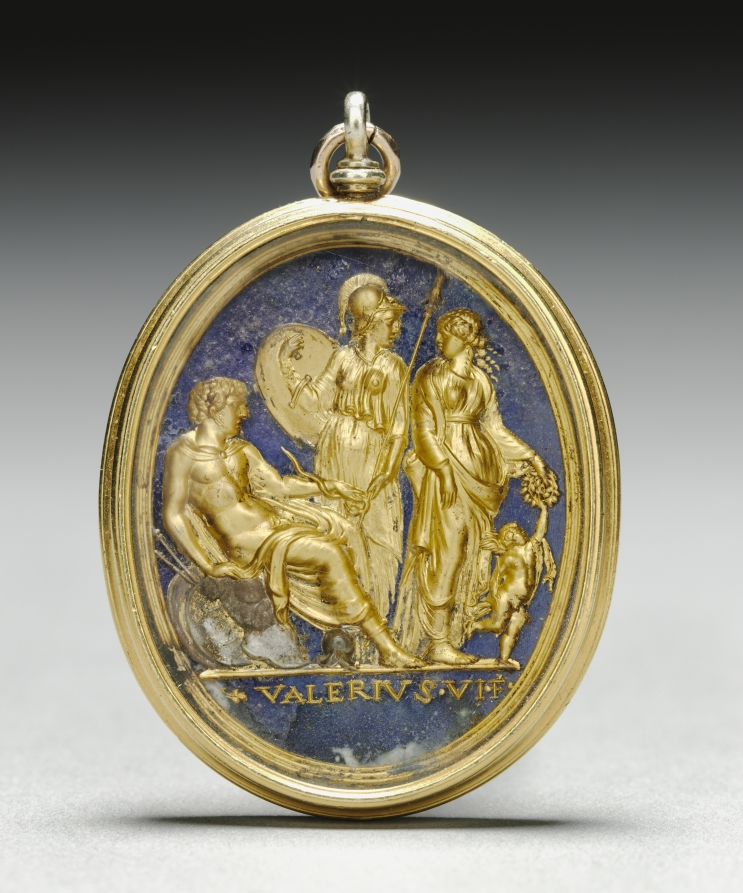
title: Mars, Minerva, Venus, and Cupid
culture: Italy, 16th century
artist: Valerio Belli (Italian, c. 1468–1546)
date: early 1500s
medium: rock crystal intaglio, gilded from reverse with gold and silver, backed with lapis lazuli, mounted in a gold pendant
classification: Sculpture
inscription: VALERIUS·VI·F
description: Mars, the god of war, chooses Minerva over Venus, goddesses representing Virtue and Vice. The subject was common in antiquity, although the male figure traditionally represents Hercules. The snake passing from Minerva to Mars lionizes wisdom, perhaps indicating that the patron, who has yet to be identified, connected the idea of a difficult choice to a specific military or political problem.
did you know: Lapis lazuli, the stone used in this pendant, was first mined in Afghanistan 9000 years ago.